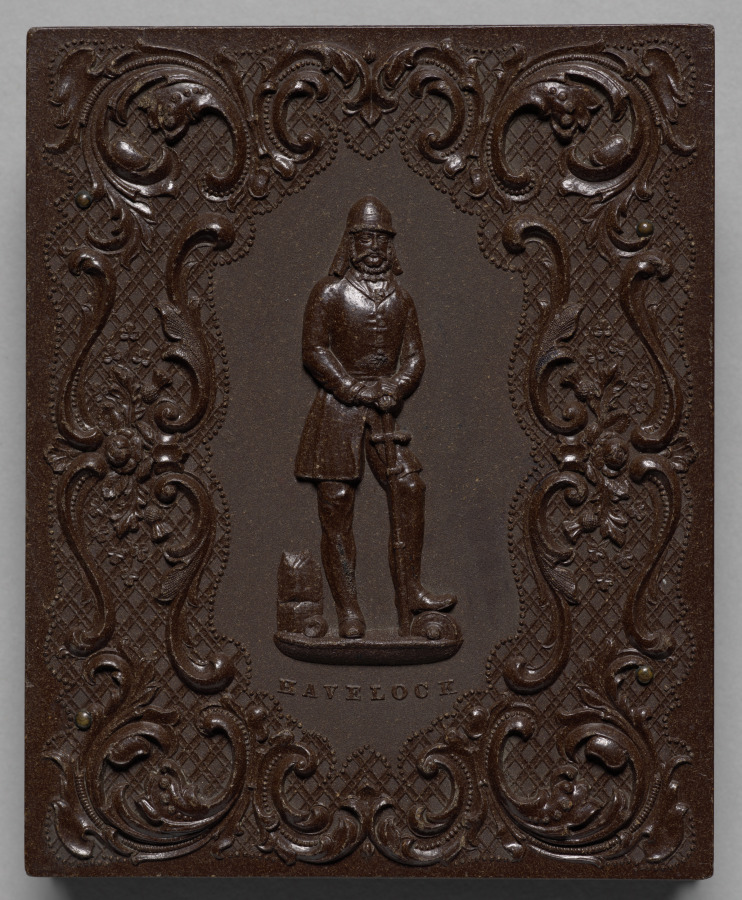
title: The Homework Table & Parents of Five Children Doing Homework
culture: America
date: c. 1858–60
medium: daguerreotype, quarter plate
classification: Photograph